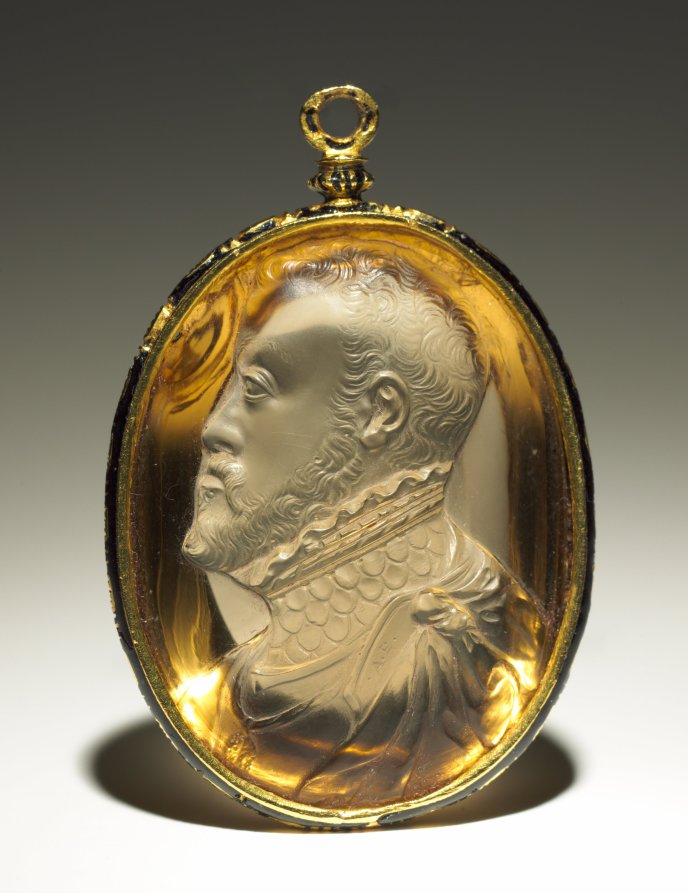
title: Portrait of Philip II, King of Spain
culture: Italy, 16th century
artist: Alessandro Cesati (Italian, before 1538-after 1564)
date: mid-1550s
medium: citrine, mounted in a gold and enamel pendant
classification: Sculpture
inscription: Signed on collar .A.E. (Likely abbreviation for “ΑΛΕΞΑΝΔΡΟΣ ΕΠΟΙΕΙ”, or “Alexandros Epoiei,” which translates to “Alexander made [me / this].”)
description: Clad in armor, Philip II wears a chain with the Order of Golden Fleece around his neck. The remarkably precise and varied cutting describes the textures of cloth, metal, skin, and hair while presenting the king’s features with striking naturalism—complete with receding hairline and prominent chin—as well as conveying his forceful character. Carved gems were luxury arts of the highest order in the Renaissance, hotly collected and used as diplomatic gifts. The original patron is not yet known, but cameos played a prominent role at the Spanish court, where the royal family often hold gems of Philip II in their portraits. The yellow quartz, rare in the 1500s, probably came from a newly opened source in South America; this object is thus both a natural marvel and a masterful portrait. One of only three known works signed by the artist (his initials appear at miniscule scale on the collar just below the knot of cloth), this stone is also likely in its original setting.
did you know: The ancient Romans believed citrine, a type of quartz, offered protection against evil thoughts.